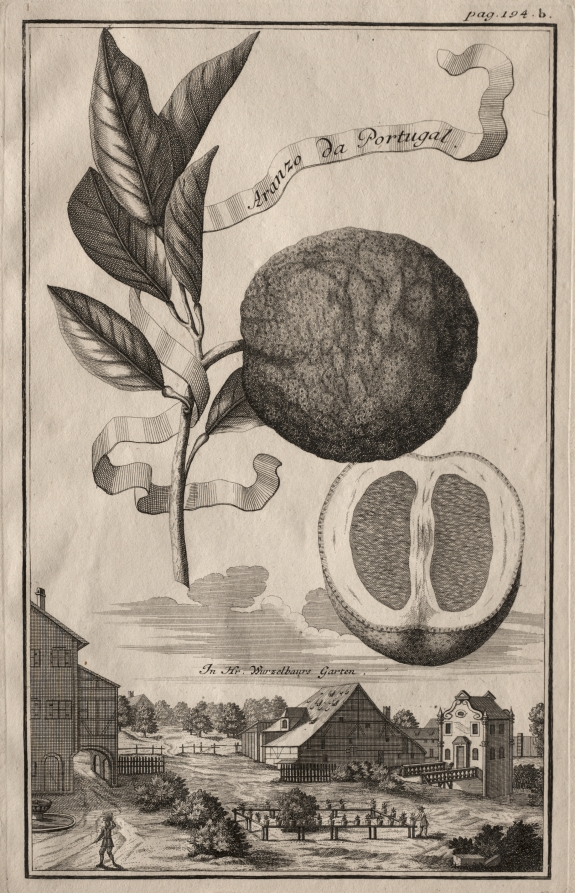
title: Nurnbergische Hesperides: Aranzo da Portugal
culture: Hungary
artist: Joseph de Montalegre (Hungarian)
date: 1714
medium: etching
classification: Print